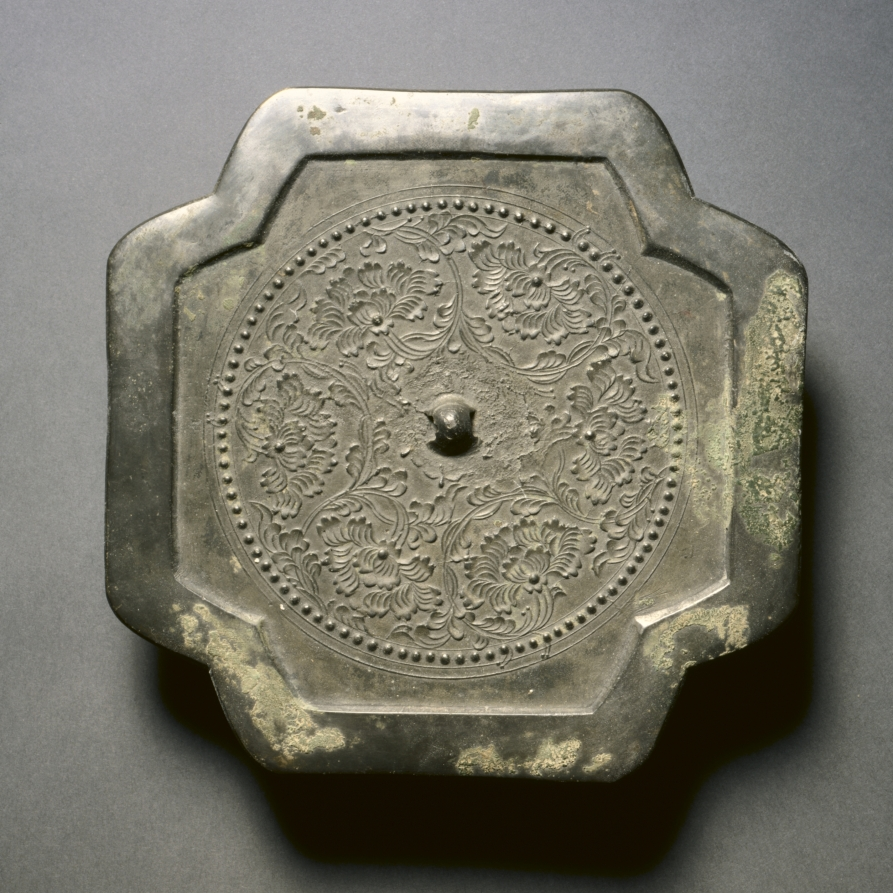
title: Cruciform Mirror with Six Blossoms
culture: China, Northern Song dynasty (960-1127)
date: 960–1127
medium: bronze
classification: Metalwork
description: This cross-shaped mirror has a simple wide frame and a small knob. A part of the floral pattern surrounding the knob has been compromised, likely due to poor casting or damage. The mirror is decorated with designs of flower branches and leaves, which encapsulate six flowers. A few of these branches protrude beyond the beaded circular border to touch the edge of the outer circle, adding a playful dynamism. Similar motifs can be found on silver objects and porcelain of this period.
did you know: Bronze mirrors were made in China from neolithic times until the Qing dynasty, when glass mirrors were brought to China from the West.